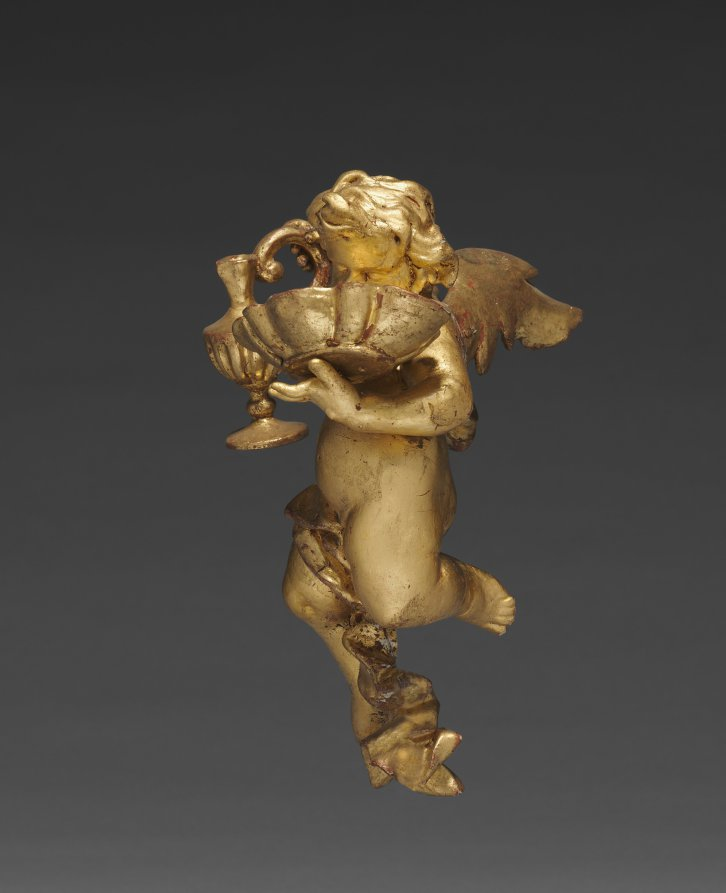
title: Altarpiece with Relics - Putto with Ewer, upper left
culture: Germany, Bavaria, 18th century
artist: Joseph Matthias Götz (German, 1696–1760)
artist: and Workshop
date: c. 1735–40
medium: gilded wood, with relics in niches: gilded wood, mother-of-pearl, ebony, red silk, gold wire, seed pearls, rock crystal, pen and ink on paper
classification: Sculpture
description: Götz covers every surface in gold leaf, giving each part of the object equal importance, rather than simply framing a central picture. In this distinctively Central European approach, figural narrative is subordinate to the overall ensemble. Götz designed this object to rest on top of an altar, probably in front of a larger painted or sculpted decorative scheme. The work contains relics seen through the small windows on the perimeter. These small remains of holy figures demonstrate the persistence of a medieval Catholic tradition well into the 1700s.